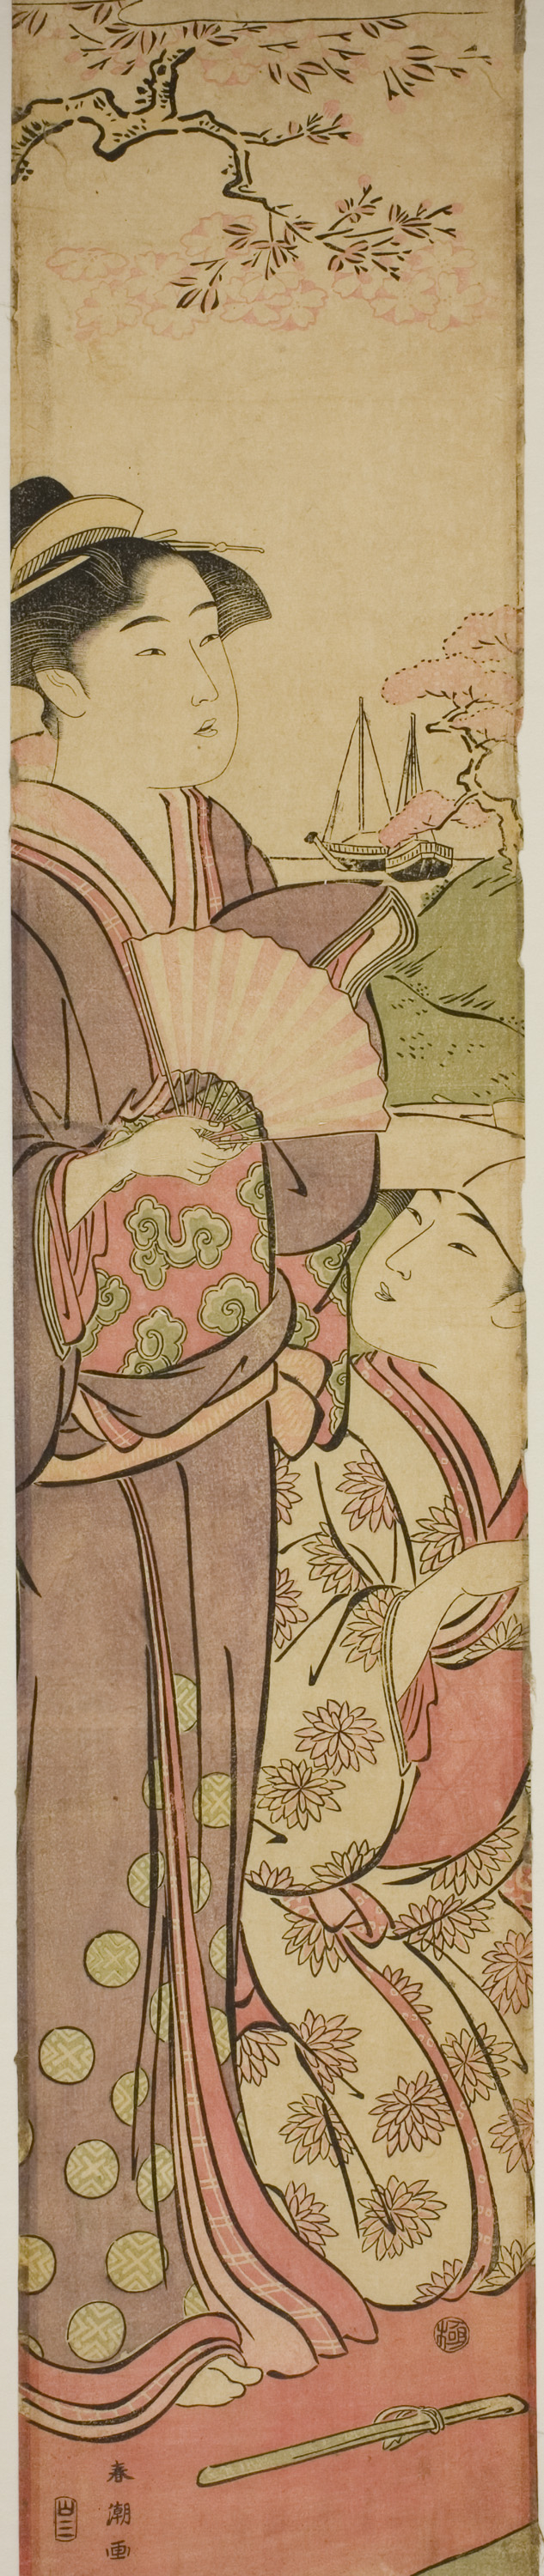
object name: Print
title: Viewing Cherry Blossoms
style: Japanese (culture or style)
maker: Katsukawa Shuncho; Japanese, active c. 1781-1801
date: c. 1788/89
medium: Color woodblock print; hashira-e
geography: Japan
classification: woodblock print; print; asian art